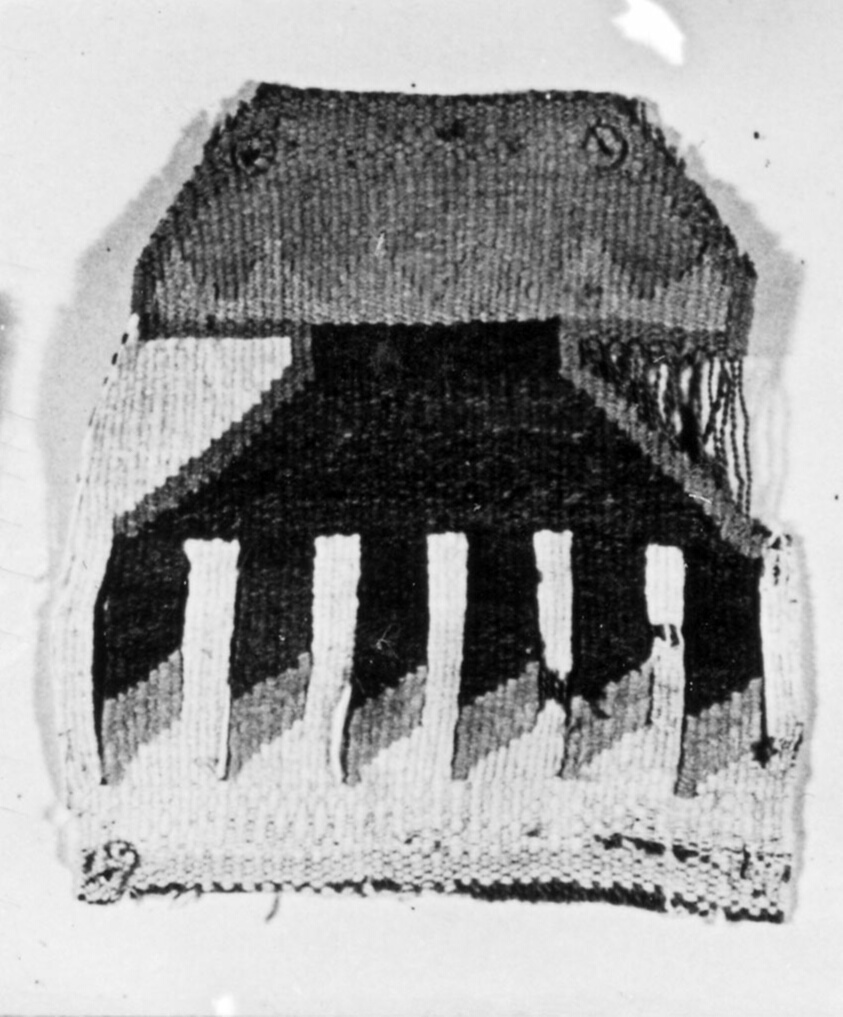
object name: Textile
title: Patch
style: lambayeque, chimú, late intermediate period, Pre-Columbian, americas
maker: Lambayeque (Probably north coast, Peru)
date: A.D. 1000/1476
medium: Slit tapestry, simple cloth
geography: Peru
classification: textile; weaving